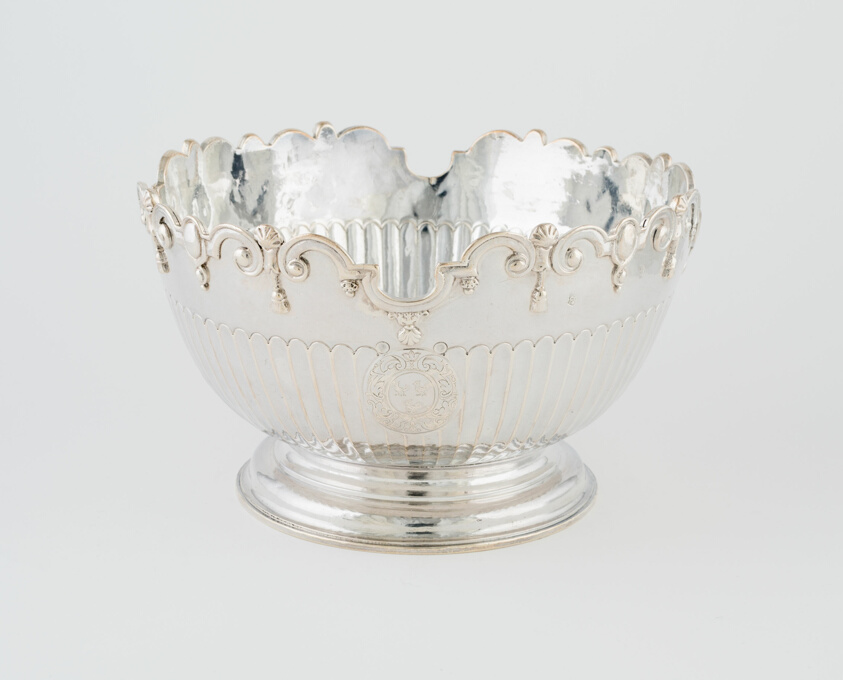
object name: Metalwork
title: Monteith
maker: Robert Cooper; English, active 1706; London, England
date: 1706/07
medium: Silver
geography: London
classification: vessel for serving food; silver; metalwork; european decorative arts